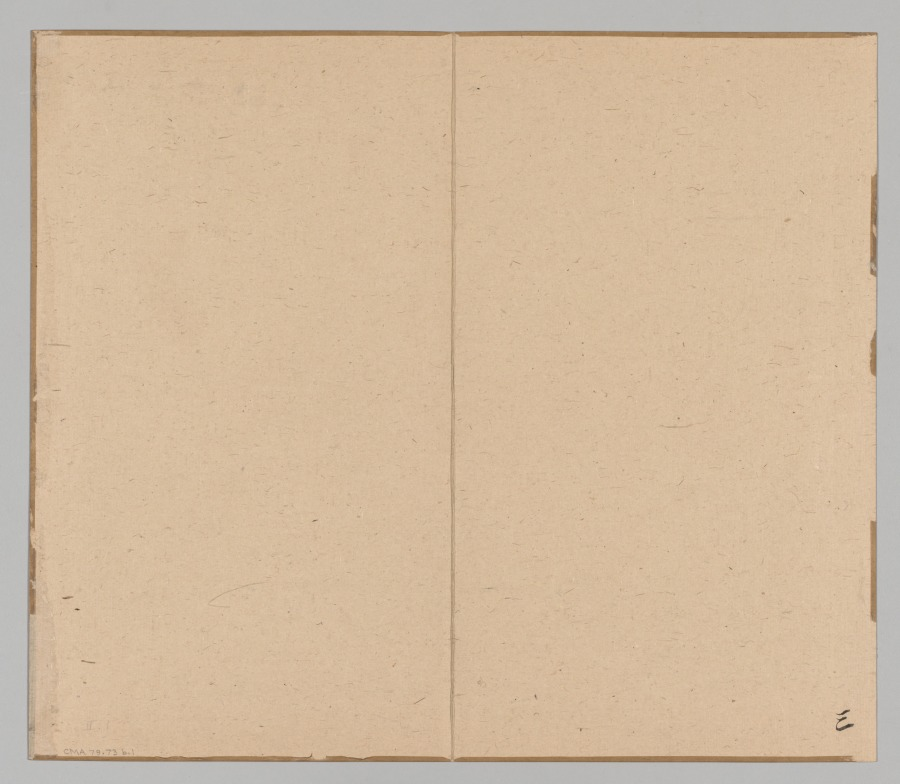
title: Reverberations of Taiga, Volume 2 (leaf 1)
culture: Japan, Edo period (1615–1868)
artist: Aoki Shukuya (Japanese, d. 1802)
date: mid- to late 1700s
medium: double-leaf from a pair of albums; ink and light color on paper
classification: Portfolio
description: Traditionally, young painters in Japan began their studies with an established master-painter. The master's compositions invariably became models that the apprentice copied to learn various ink and brush techniques. Shukuya was a pupil of the famous Kyoto artist Ikeno Taiga, whose style is reflected in these sketches of rocks, trees, and mountains.